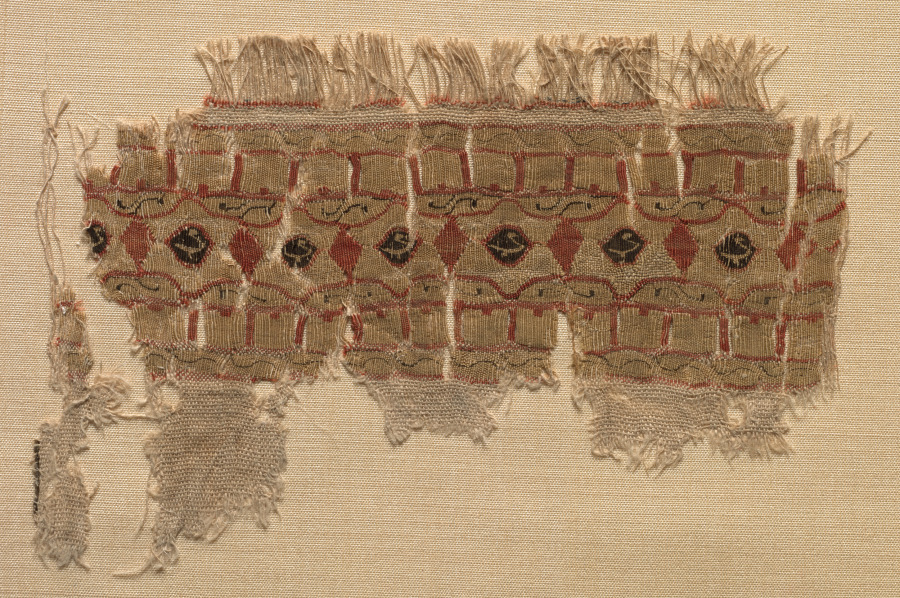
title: Fragment of a Tiraz-Style Textile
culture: Egypt, Fatimid period, Caliphate of al-Amir or al-Hafiz, AH 495-544, 12th Century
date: 1101 – 1149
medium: tabby ground with inwoven tapestry ornament; linen and silk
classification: Textile